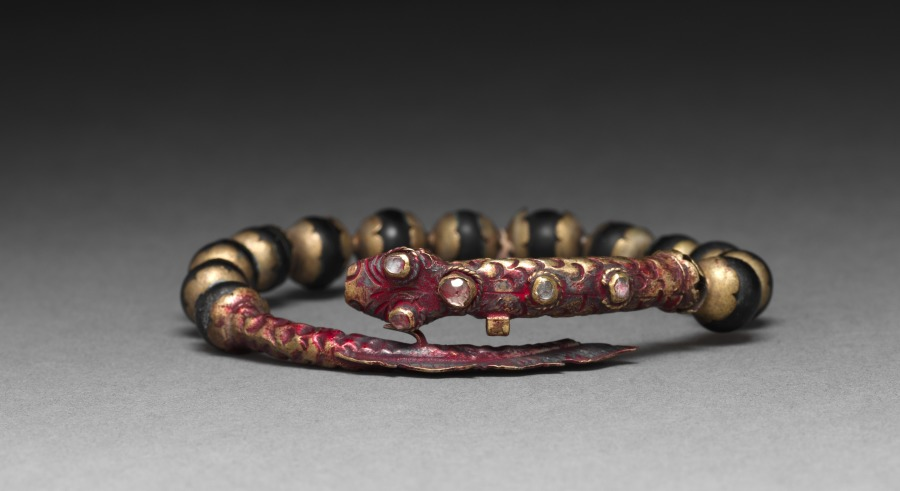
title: Bracelet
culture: Siam (?)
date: 1800s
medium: gold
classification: Jewelry